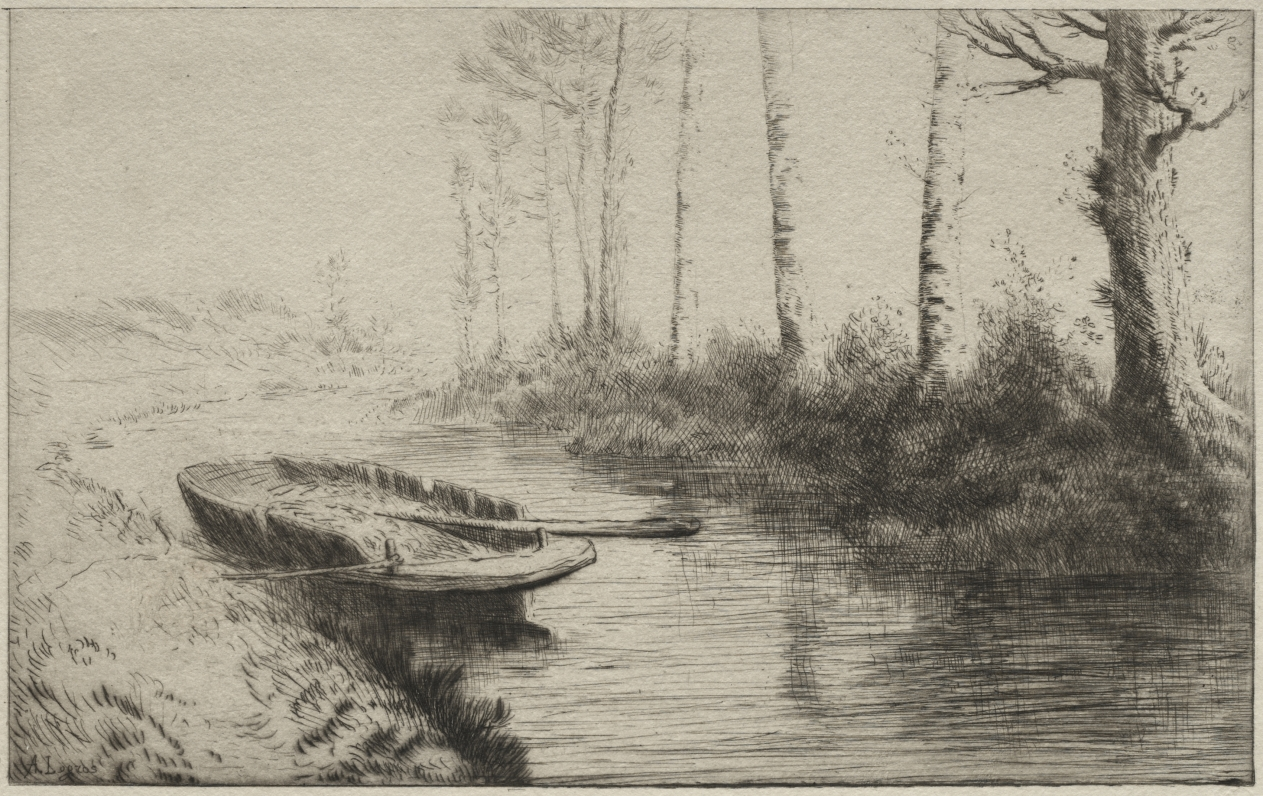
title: The Canal, Morning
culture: France, 19th century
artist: Alphonse Legros (French, 1837–1911)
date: c. 1857–1911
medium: etching and drypoint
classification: Print